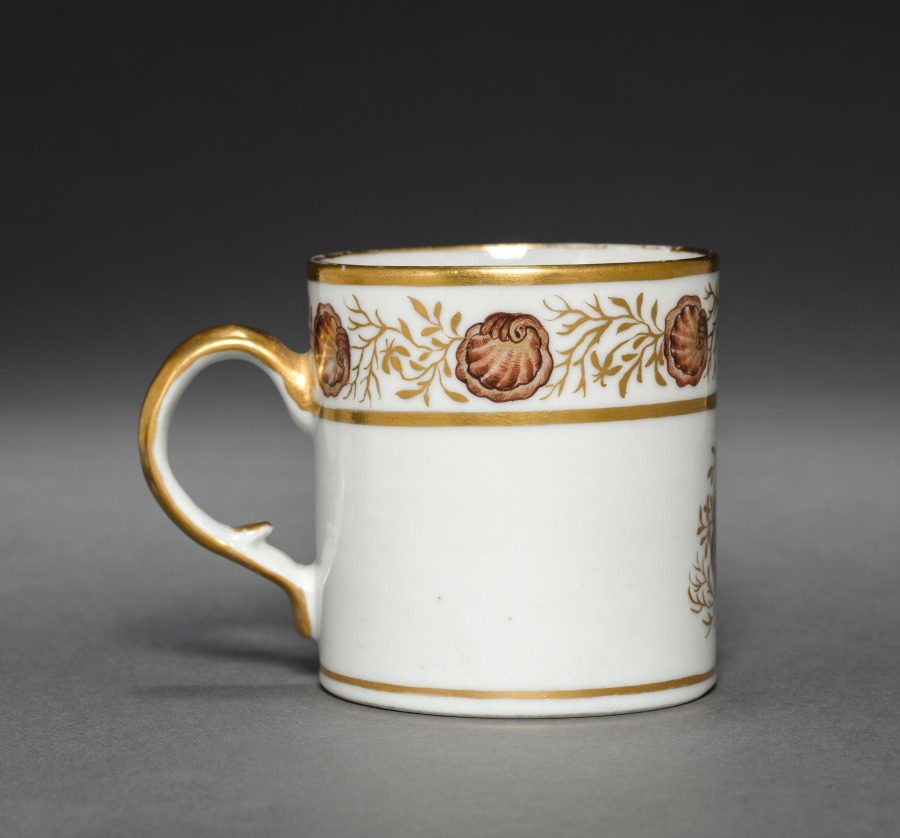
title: Cup from Oliver Wolcott, Jr. Tea Service (4 of 6)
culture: Chinese Export porcelain, late 18th-early 19th century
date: 1785–1805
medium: porcelain, sepia enamel, gold leaf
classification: Ceramic